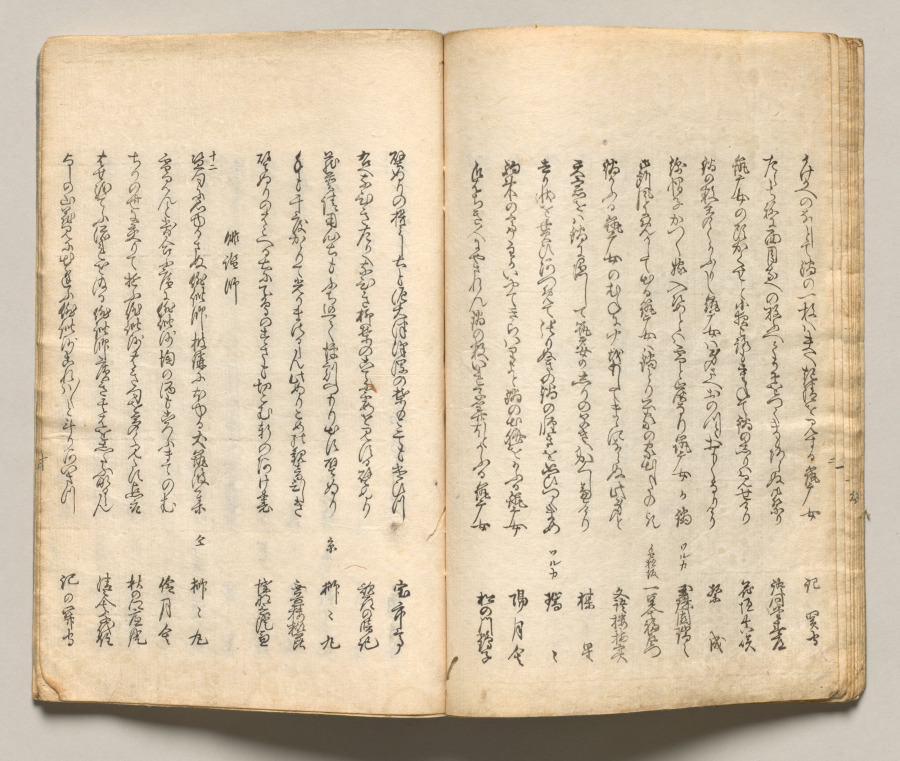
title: Spread Ten from Volume Seven of People of Japan in Light Verse (Kyōka)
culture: Japan, Edo period (1615–1868)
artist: Utagawa Hiroshige (Japanese, 1797–1858)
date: 1857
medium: Woodblock-printed book; ink and color on paper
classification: Bound Volume